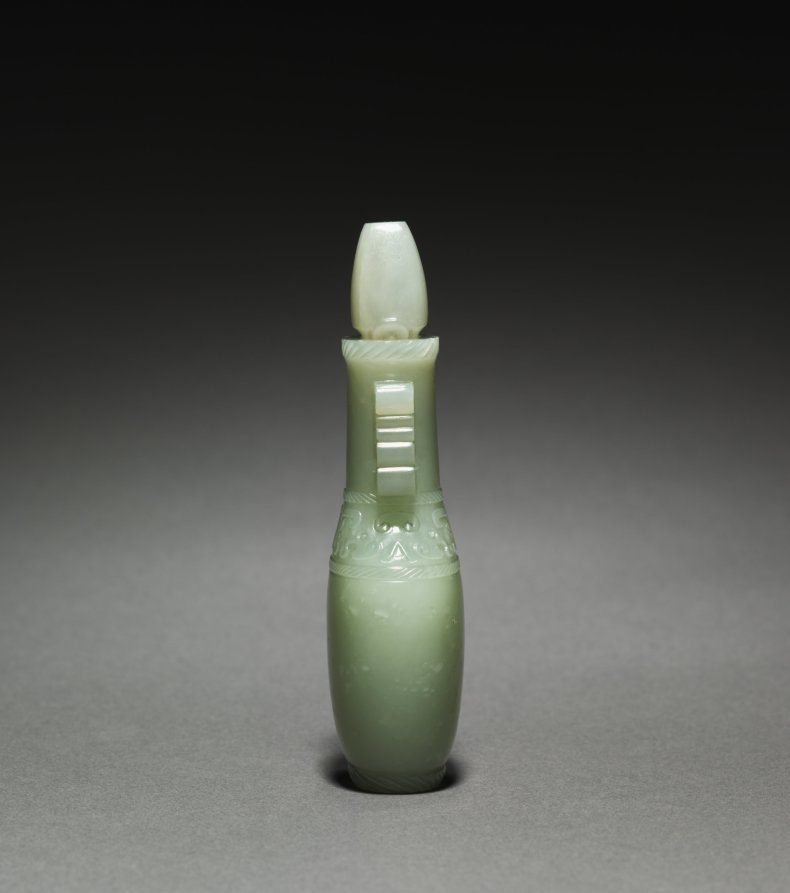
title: Bottle with Stopper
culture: China, Qing dynasty (1644–1911), Qianlong reign (1736–95)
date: 1736–95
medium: jade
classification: Jade